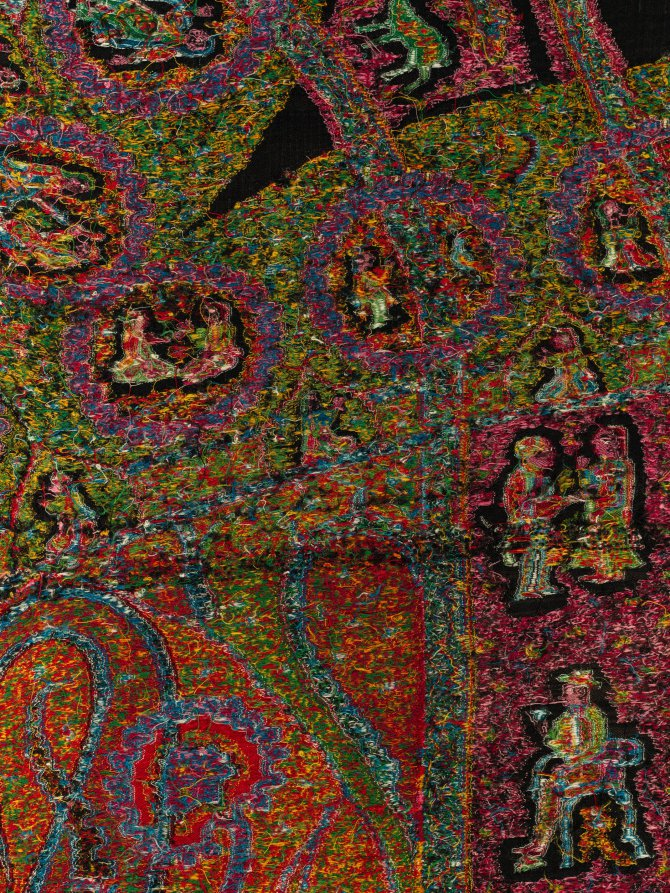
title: Long shawl with woven figures and animals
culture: India, Kashmir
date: c. 1885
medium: 2/2 twill tapestry weave, double interlocked and pieced: wool (possibly pashmina)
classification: Textile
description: Kashmir shawls from India were status symbols in Europe during the 1800s, and few are as rare as this woven example. Over 200 human figures take part in drinking, smoking, dancing, and falconry in the Indian princely scenes that enliven the shawl’s borders and four dark stripes. The stripes alternate with large elongated boteh, or paisley, motifs that intertwine with blossoming stems in a European style adapted by Kashmiri textile artists. This extraordinary woven shawl was probably made to dazzle the jury at one of the European expositions of industrial products, as almost all other figural shawls were embroidered. It was woven in many pieces and then skillfully joined with colorful harlequin end borders.